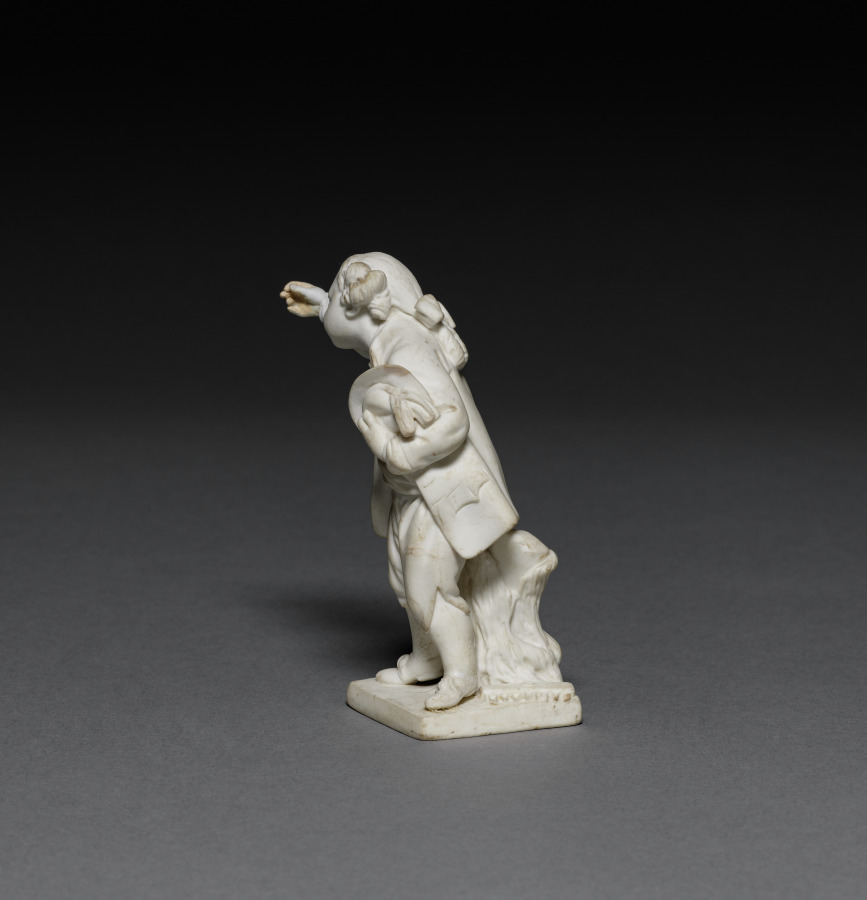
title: Figure of a Bird Charmer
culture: France, Sèvres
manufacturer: Sèvres Porcelain Factory (French, est. 1756)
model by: Etienne-Maurice Falconet (French, 1716–1791)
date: 1764–66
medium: Unglazed soft-paste porcelain (biscuit)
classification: Ceramic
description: Designs for 17 young children involved in various activities were issued by sculptor Étienne-Maurice Falconet and regularly reproduced as porcelain figurines. This figure, who stretches out his hand in anticipation that a bird might land, would have been modeled after one of these designs. Decorative figurines like these were often included in elaborate dining services to be placed about a table along with the usual tureens and tableware.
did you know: 31 figures modeled after Falconet’s series were included in the dinner service given by French King Louis XV to Christian VII, King of Denmark in 1768.